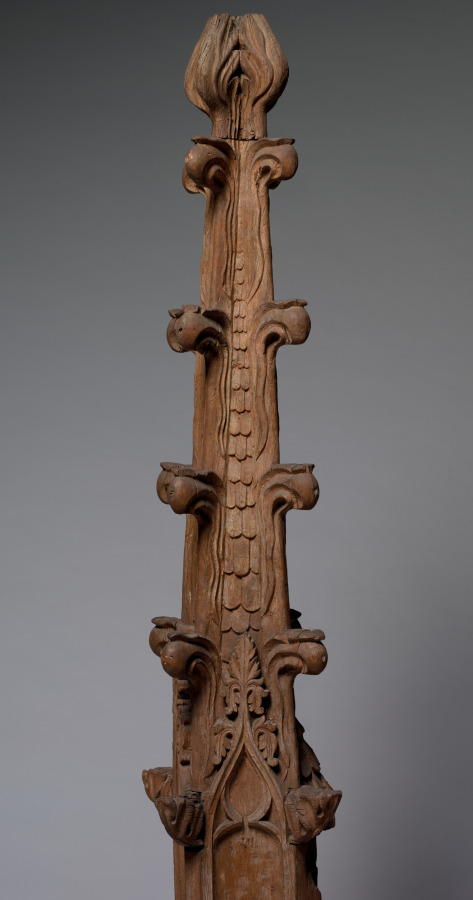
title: Pinnacle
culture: France, 15th century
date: 1400s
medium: oak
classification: Furniture and woodwork